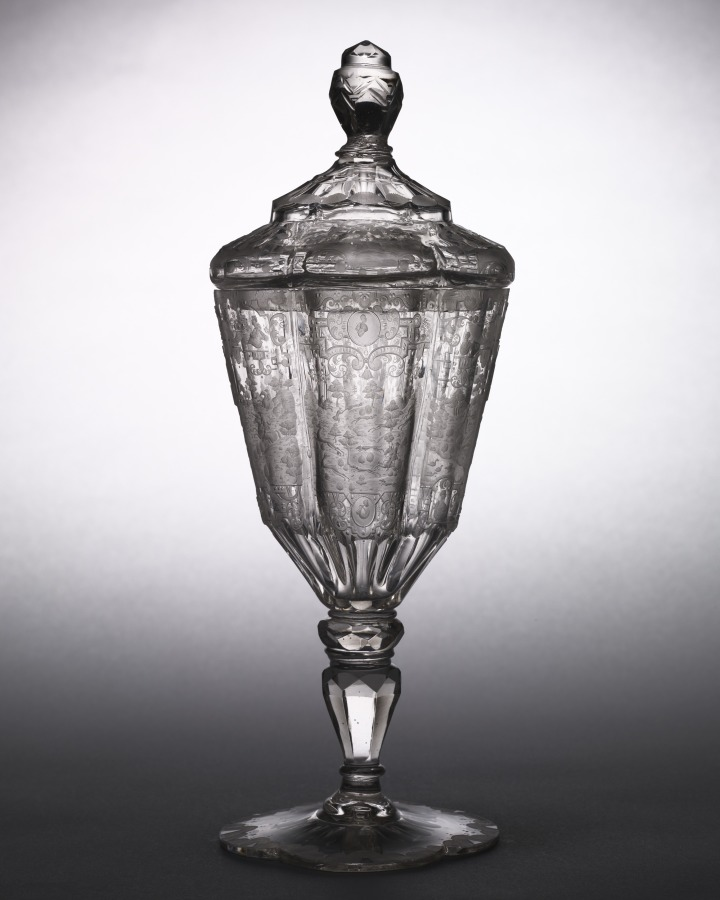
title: Standing Cup with Cover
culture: Germany, Silesia, 18th century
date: c. 1725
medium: glass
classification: Glass